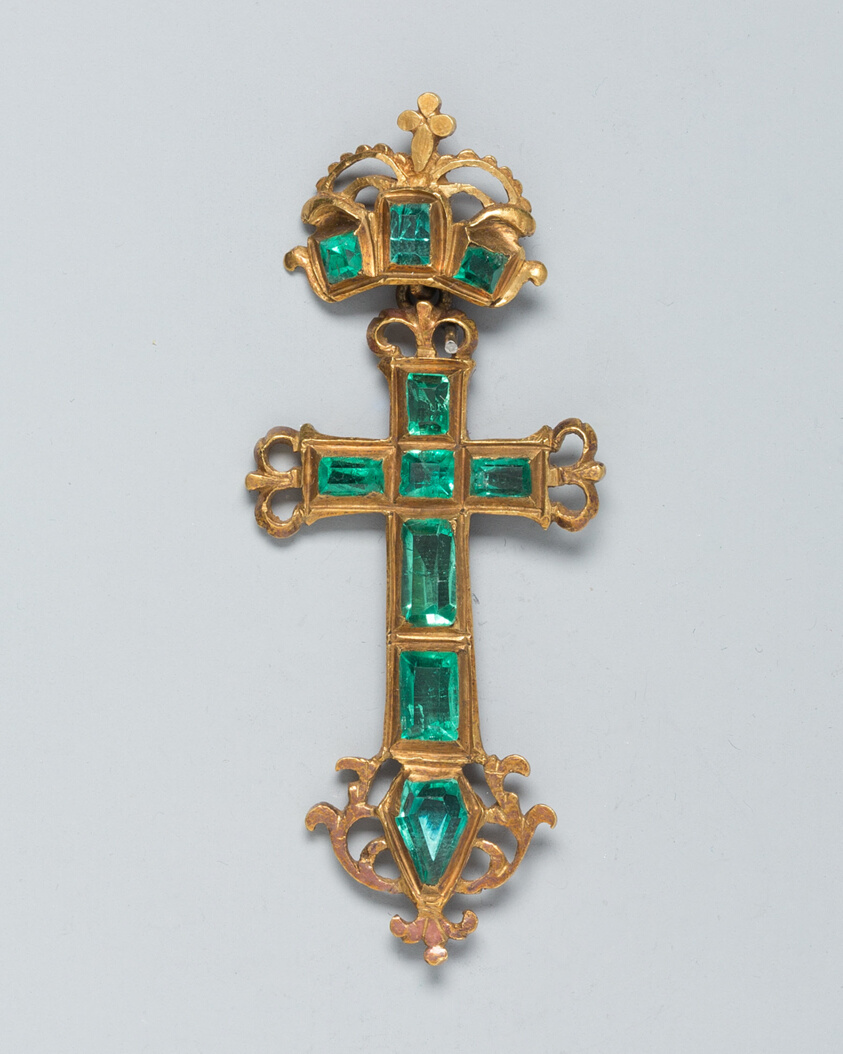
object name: Costume and Accessories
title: Pendant Cross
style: spanish colonial, european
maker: Spanish or Spanish Colonial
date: 17th century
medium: Gold and emeralds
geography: Spain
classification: pendant (jewelry); jewelry; european decorative arts; costume